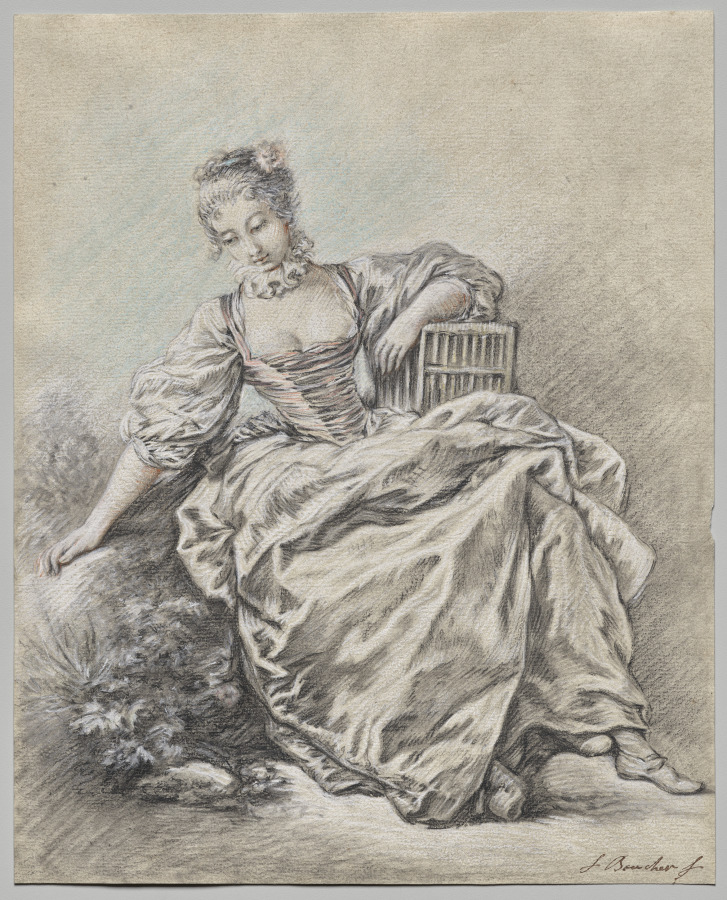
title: Seated Woman Holding a Bird Cage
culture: France, 18th century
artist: copy after François Boucher (French, 1703–1770)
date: probably 18th century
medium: Black chalk with stumping (in drapery) and wet work (hair and eyes) and red and white chalk, with blue chalk and traces of yellow chalk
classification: Drawing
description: This chalk drawing originated from the studio of François Boucher. Although it bears Boucher’s signature—seen at lower right—the image was likely executed by a member of the master’s shop, rather than Boucher himself. Despite the anonymity of the draftsman, the image nonetheless reproduces one of Boucher’s designs and was therefore considered a work by the master.